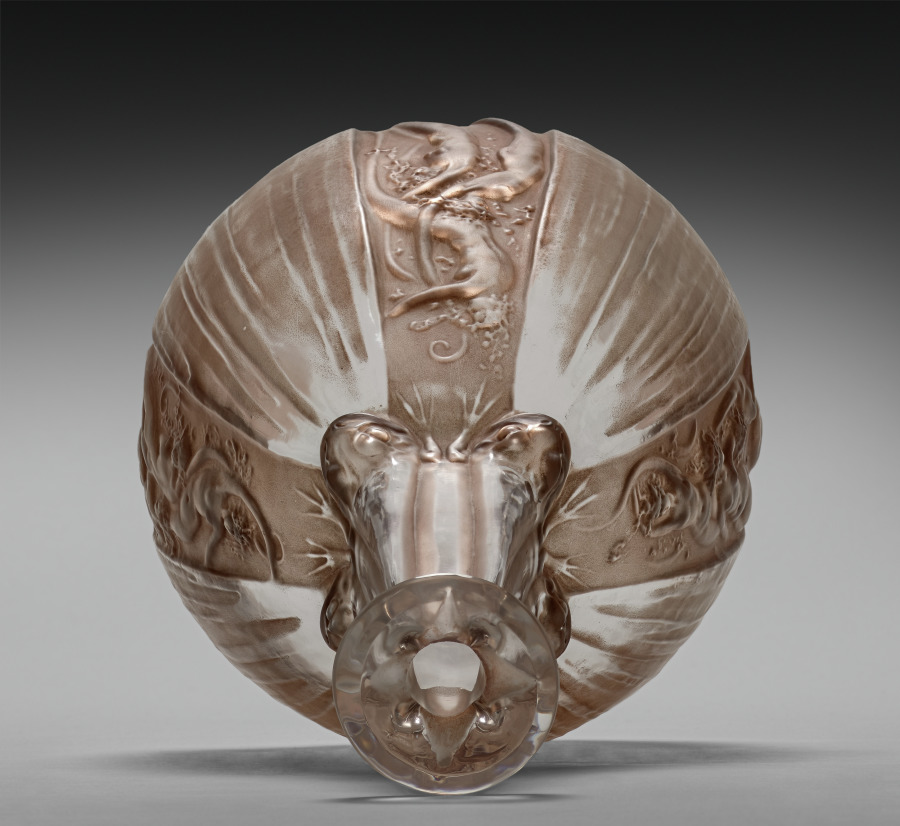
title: Mermaids and Frogs Decanter (Carafe sirènes et grenouilles)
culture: France, 20th century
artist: René Lalique (French, 1860–1945)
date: 1917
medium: glass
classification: Glass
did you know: The title of this work translates to mermaids and frogs carafe.